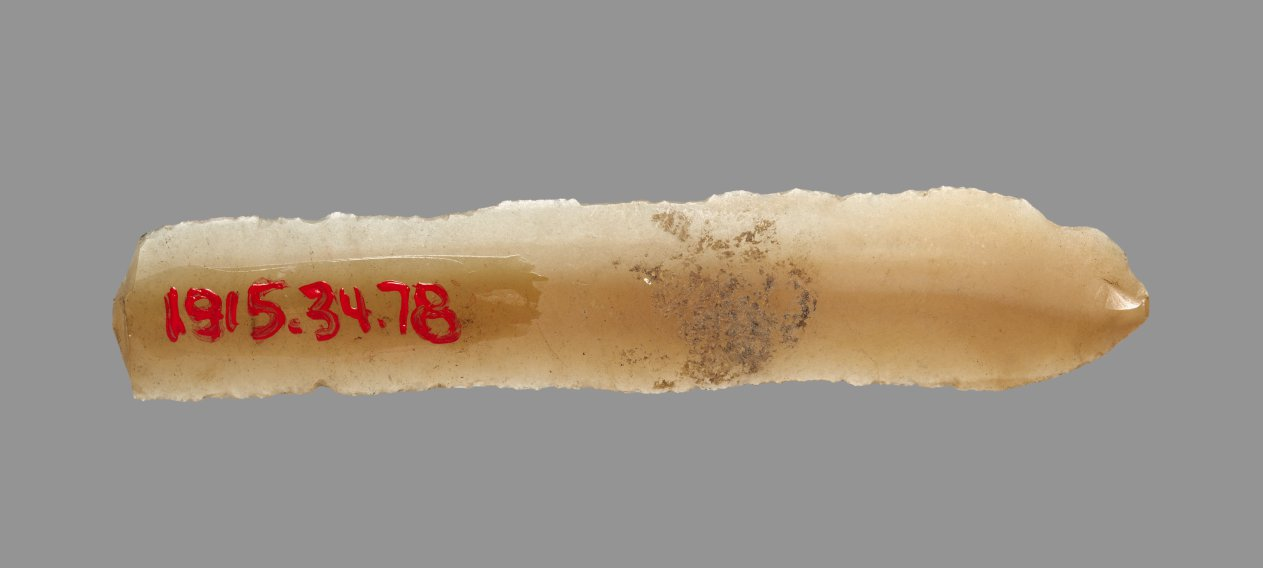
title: Sickle Blade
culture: Egypt, Middle Kingdom (2040–1648 BCE), Dynasty 12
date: 1980–1801 BCE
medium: flint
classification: Implements